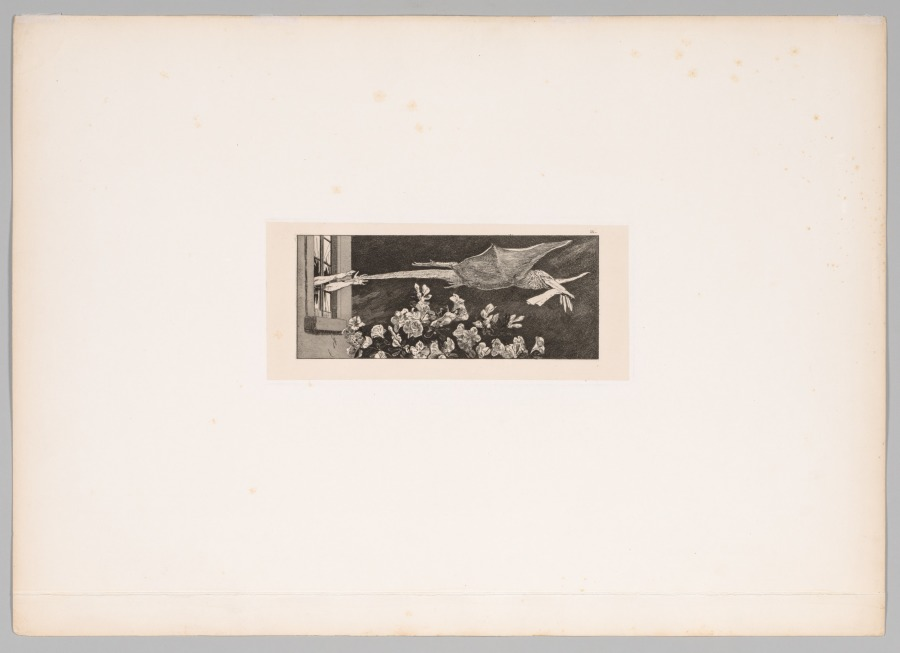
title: A Glove: The Abduction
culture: Germany, 19th century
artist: Max Klinger (German, 1857–1920)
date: 1880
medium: etching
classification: Print